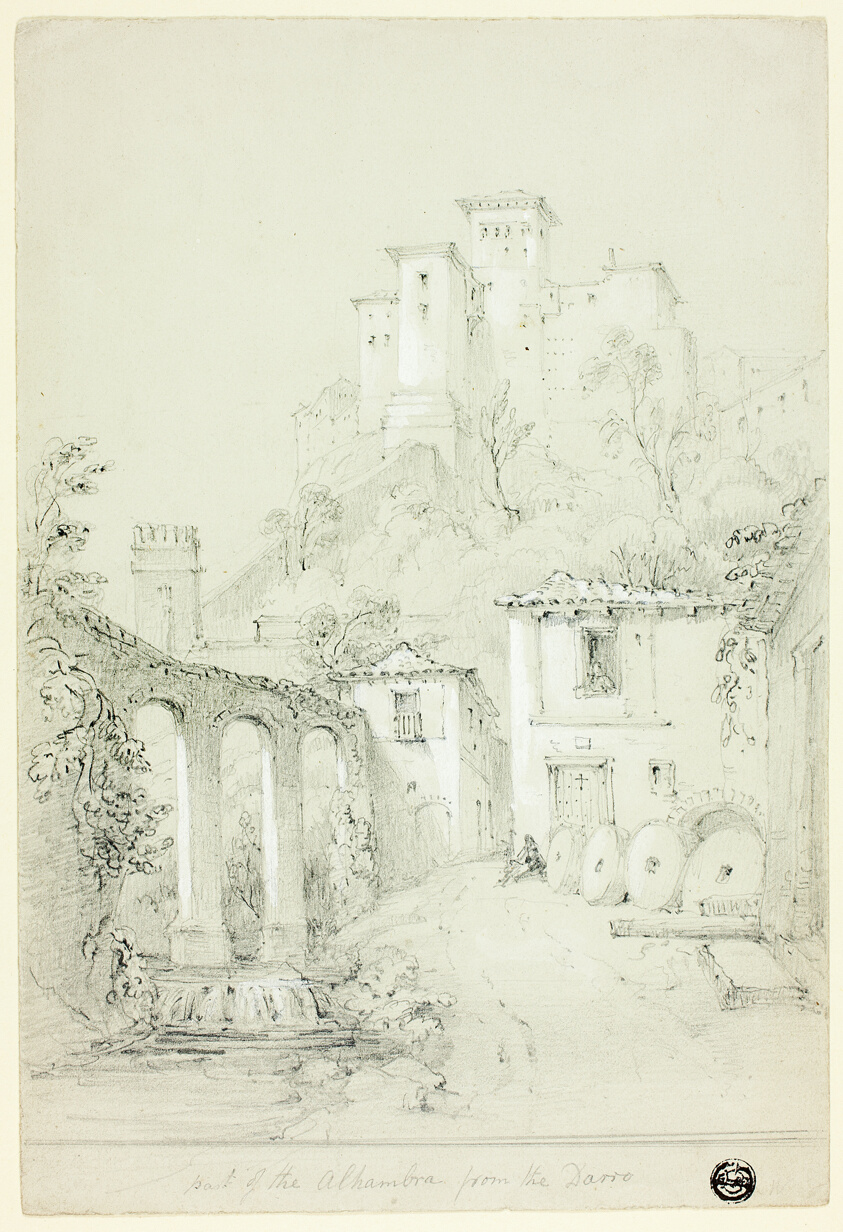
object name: Drawing and Watercolor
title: Port of the Alhambra from the Dario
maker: possibly Richard Ford (English, 1796-1858); possibly after Frederick Christian Lewis (English, 1779-1856)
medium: Graphite, heightened with white gouache, on gray wove paper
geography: England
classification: graphite; drawings (visual works); prints and drawing